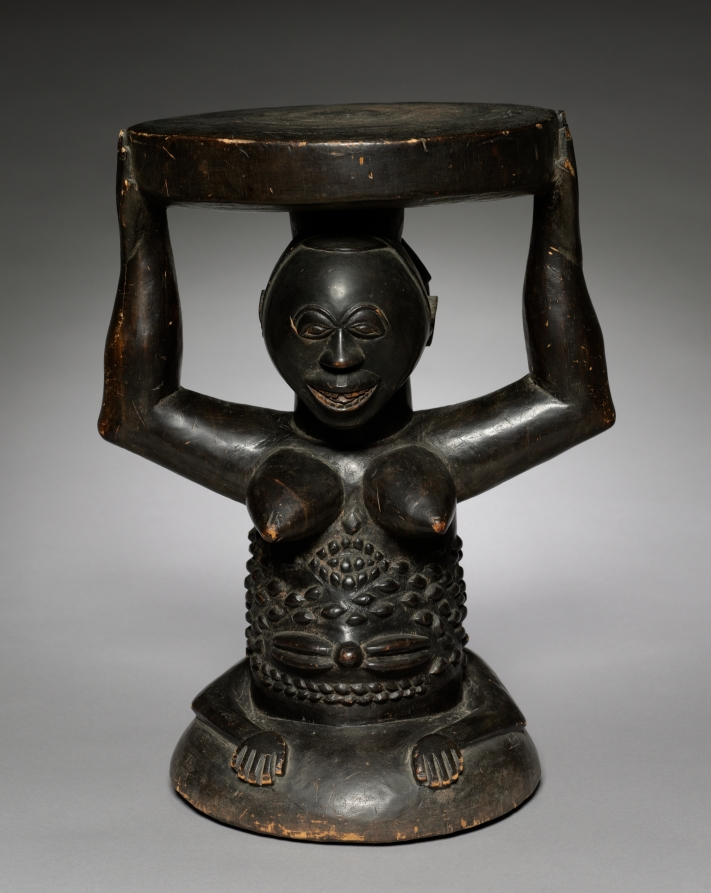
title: Caryatid Stool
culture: Africa, Central Africa, Democratic Republic of Congo, Luba-style carver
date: c. 1900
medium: wood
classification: Furniture and woodwork